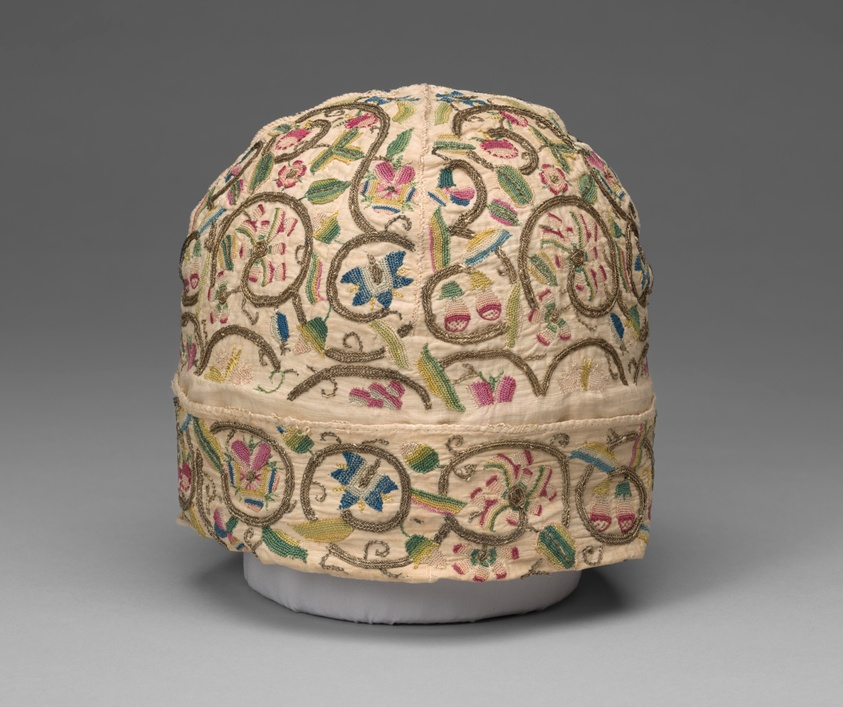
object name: Costume and Accessories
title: Man's Cap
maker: England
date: 1601/25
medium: Linen, plain weave; embroidered with silk floss and gilt-metal-strip-wrapped silk, in variety of buttonhole, chain, long-armed cross, ladder, outline, and running stitches; woven wheels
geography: England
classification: textile; needlework (visual works); patterns (guides); accessories (object genre); costume accessory; costume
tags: floral arrangements, fruit